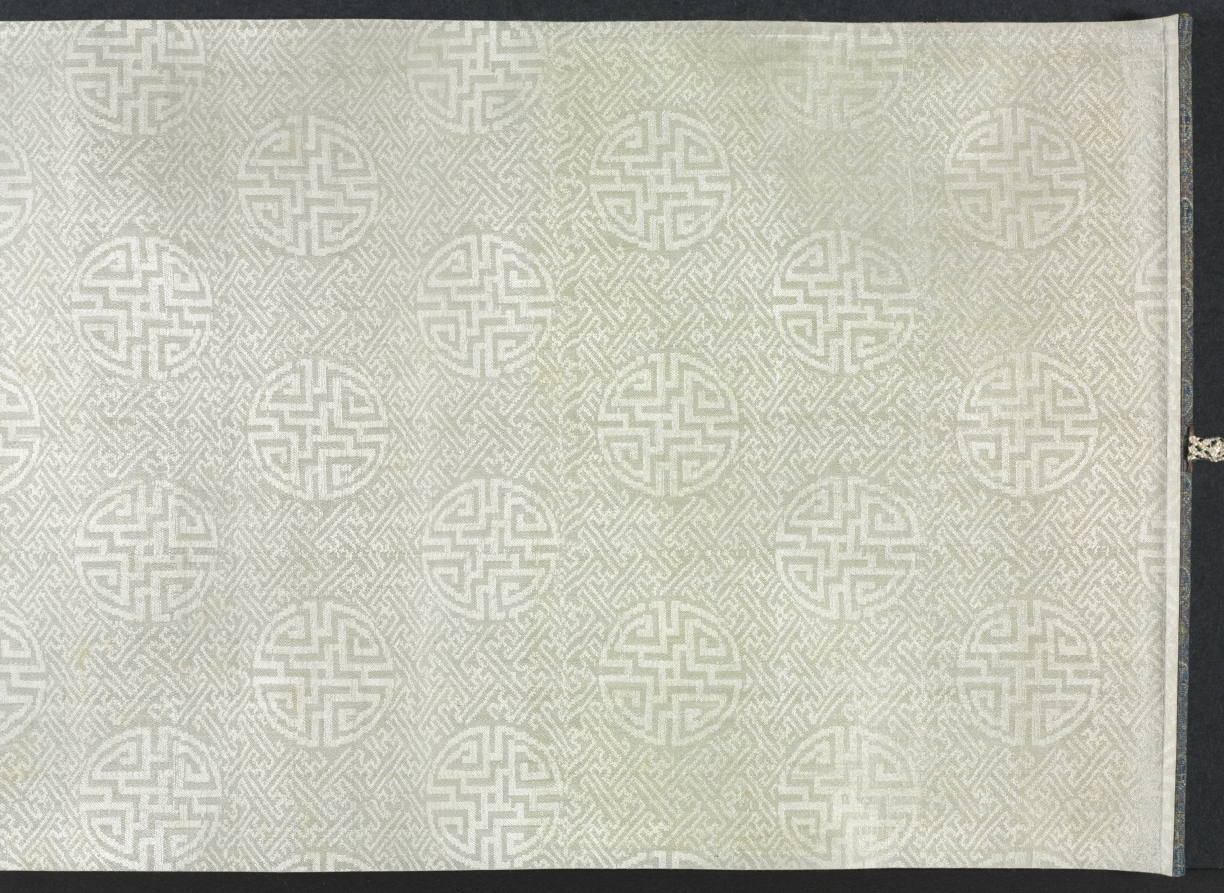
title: Purification at the Orchid Pavilion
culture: China, Qing dynasty (1644-1911)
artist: Fan Yi (Chinese, c. 1615–before 1688)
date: 1671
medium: Handscroll; ink and color on silk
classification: Painting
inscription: Artist's inscription, signature, and 2 seals: Painted by Fan Yi of Zhongfu during the second month of winter of the xinhai year [1671]. [2 seals] Fan Yi zhi yin, Zi yu yi.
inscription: Title on the frontispiece by Monk Yueshan (1629-1709).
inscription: 3 colophons and 13 additional seals: 1 colophon, dated 1707, and 6 seals of Yueshan; 2 colophons and 3 seals of Wong Kwan-Shut (Huang Junshi) 黃君實 (b. 1934); 2 seals of Fu Shen 傅 申 (b. 1937); 2 seals of Tessai Tomioka 富岡鐵齋 (1836-1924).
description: By the 1600s, the historic gathering at Lanting, Zhejiang province, in 353 CE was a common theme in Chinese painting. Originally based on a composition attributed to Li Gonglin (1049– 1106), now lost, Wu school artists revived the theme. Fan Yi, the brother of the artist Fan Qi from Nanjing, used delicate brushwork and luminous colors to depict the spring gathering.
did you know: The gathering’s host is in the Orchid Pavilion at the end of the scroll, representing an episode known as “Wang Xizhi Watching the Geese 王羲之觀鵝圖.”